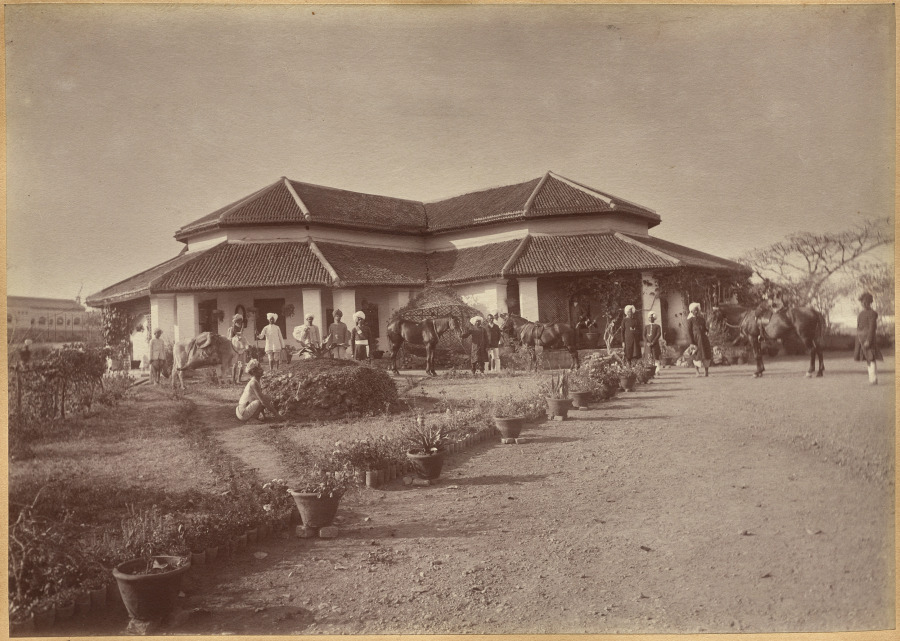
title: Major Creagh's home, Mhon (verso)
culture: India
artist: Raja Deen Dayal (Indian, 1844–1905)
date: c. 1882–87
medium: albumen print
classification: Photograph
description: These photographs are part of an album, now disassembled, of around 105 photographs taken in India between 1885 and summer 1887 that provide glimpses into the lives of the British colonial elite and royal and upper-class Indians. The museum holds another group of 37 pictures from this album (2016.266), which was probably commissioned by a British civil servant visiting or working in India around 1888 as a personal souvenir of his experiences there.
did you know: Raja Deen Dayal is regarded now, and was considered during his lifetime, to be India’s most important 19th-century photographer.